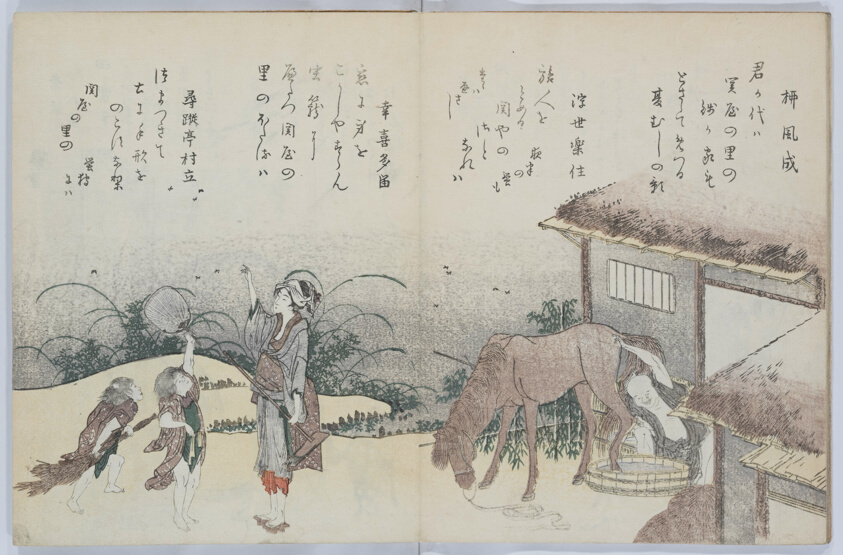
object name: Book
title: Birds of the Capital (Miyakodori)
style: Japanese (culture or style)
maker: Katsushika Hokusai 葛飾 北斎; Japanese, 1760-1849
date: c. 1802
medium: Color woodblock printed book; 1 vol.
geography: Japan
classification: book; woodblock print